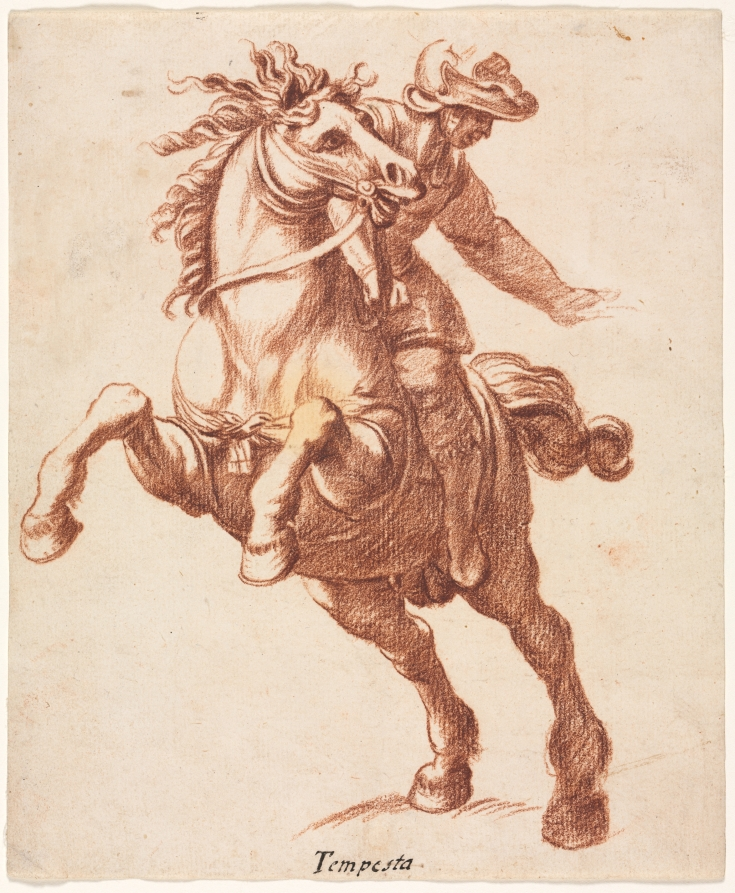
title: Rearing Horse and Rider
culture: Italy, late 16th-early 17th century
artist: attributed to Antonio Tempesta (Italian, 1555–1630)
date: c. 1600?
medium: red chalk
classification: Drawing